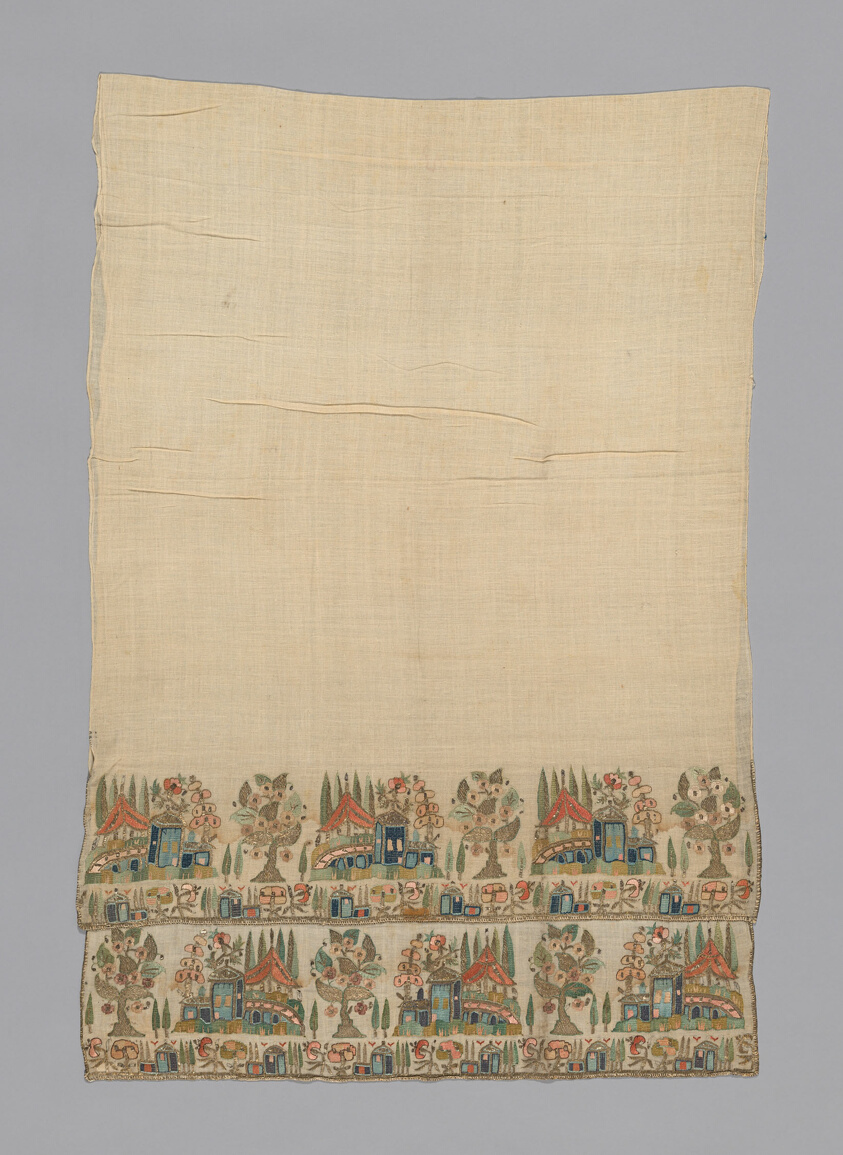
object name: Textile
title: Towel or Napkin (Altered)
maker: Turkey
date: 19th century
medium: Embroidered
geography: Turkey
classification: textile; needlework (visual works); weaving